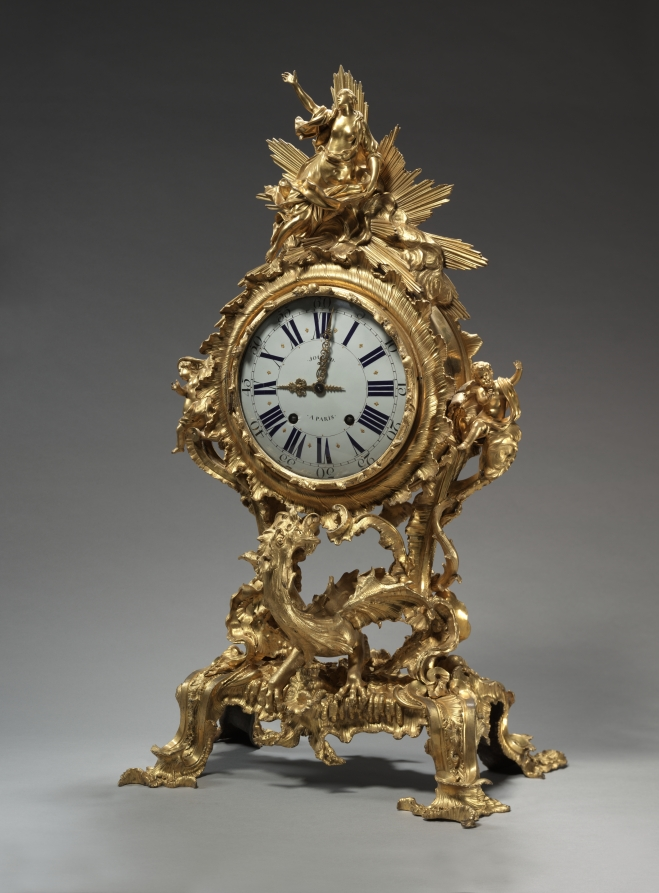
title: Clock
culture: France, 18th century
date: c. 1750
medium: gilt bronze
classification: Furniture and woodwork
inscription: on clock face: JOUARD A PARIS; engraved on plaque attached to back of clock face: Jouard Paris.